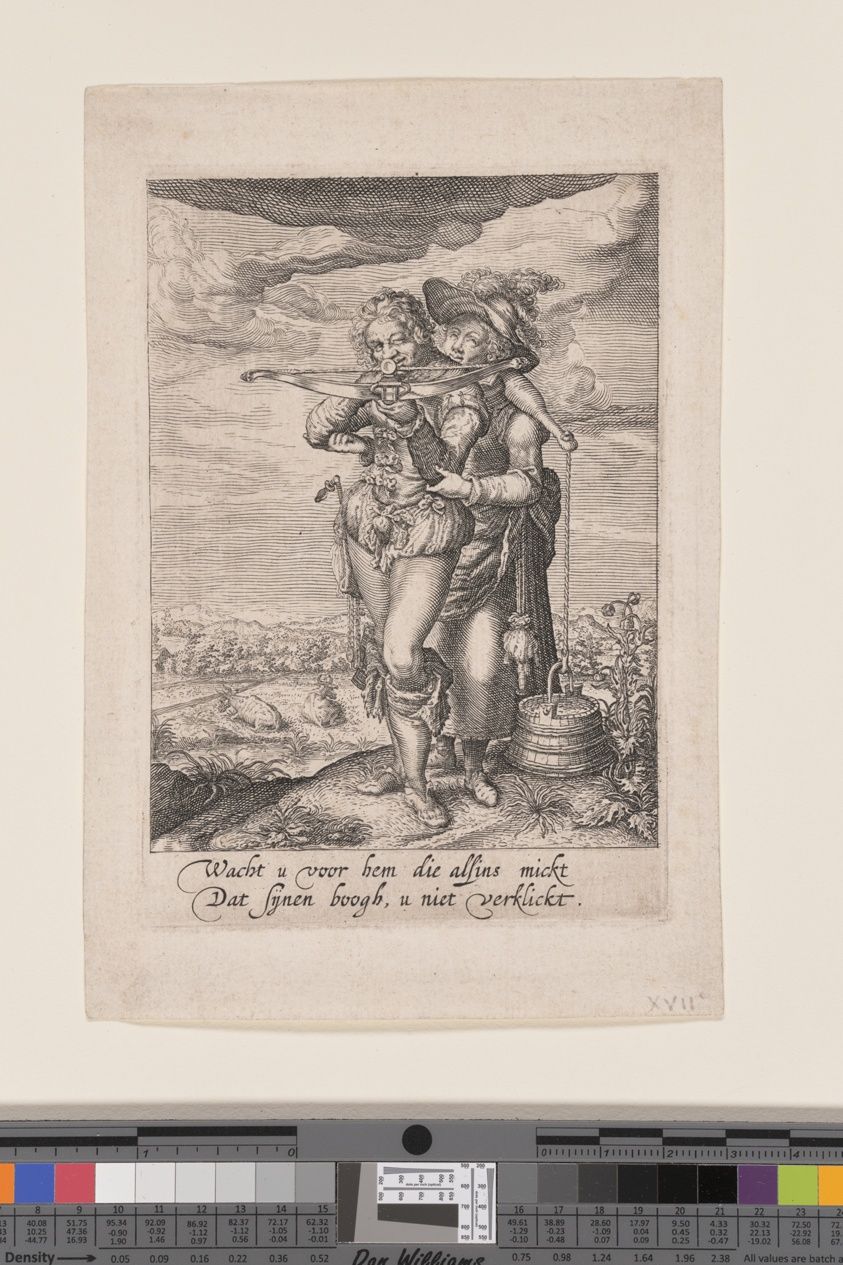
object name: Print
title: The Archer and the Milkmaid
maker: After Jacques de Gheyn II; Dutch, 1565–1629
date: after 1610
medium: Engraving on paper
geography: Netherlands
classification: engraving; paper; print; prints and drawing